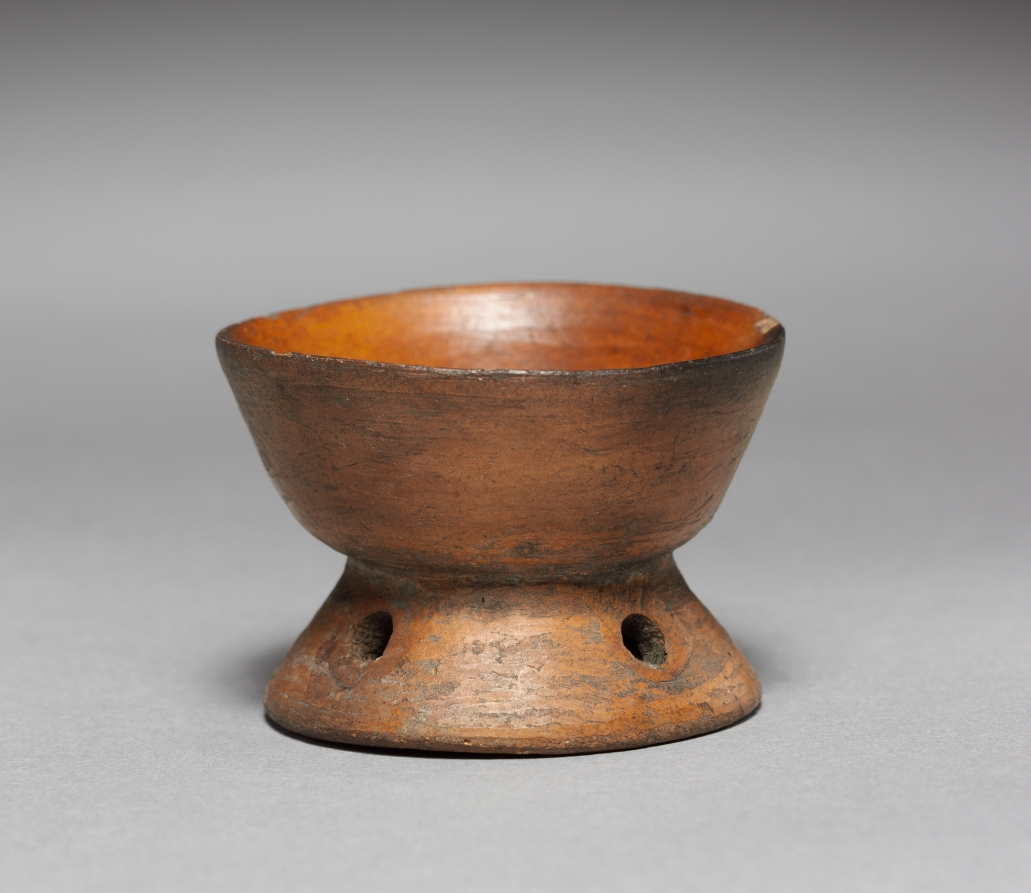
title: Dish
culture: Mexico, 16th century or earlier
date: before 1521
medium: terracotta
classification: Ceramic